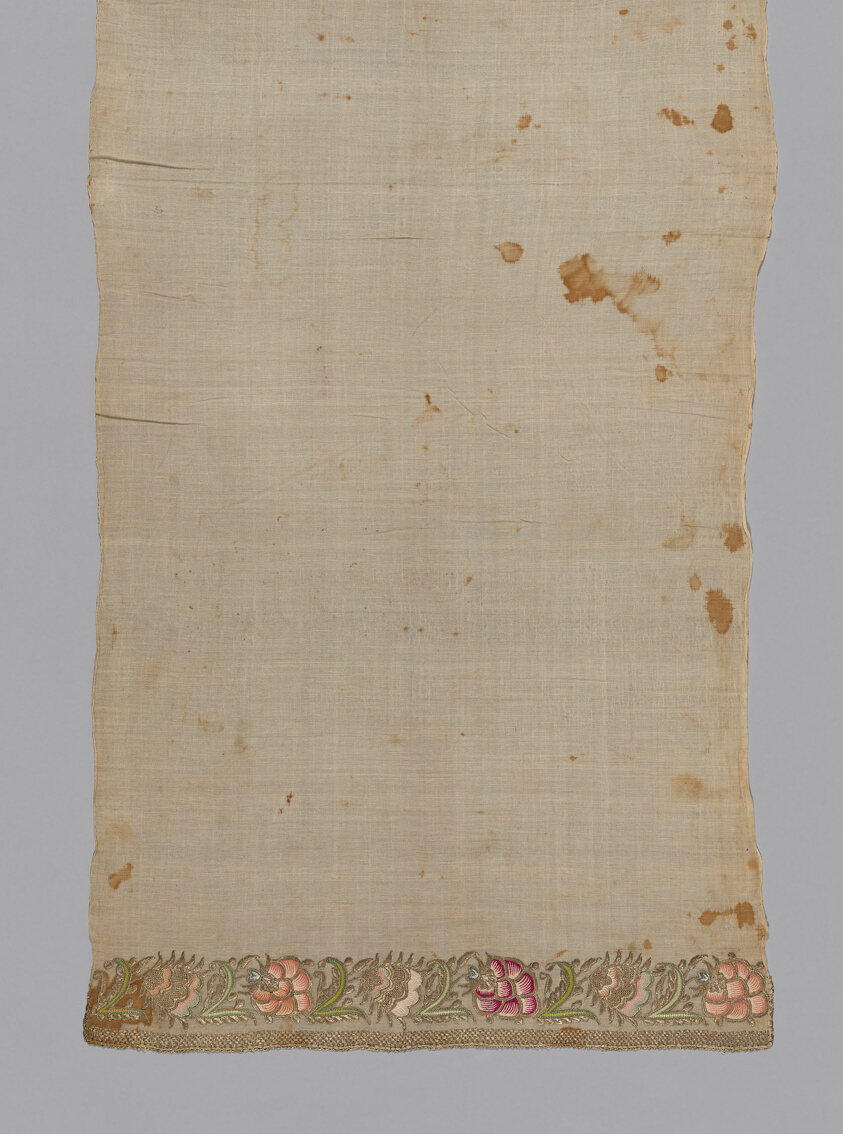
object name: Textile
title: Towel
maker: Turkey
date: 19th century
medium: embroidered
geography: Turkey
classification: textile; weaving; needlework (visual works)